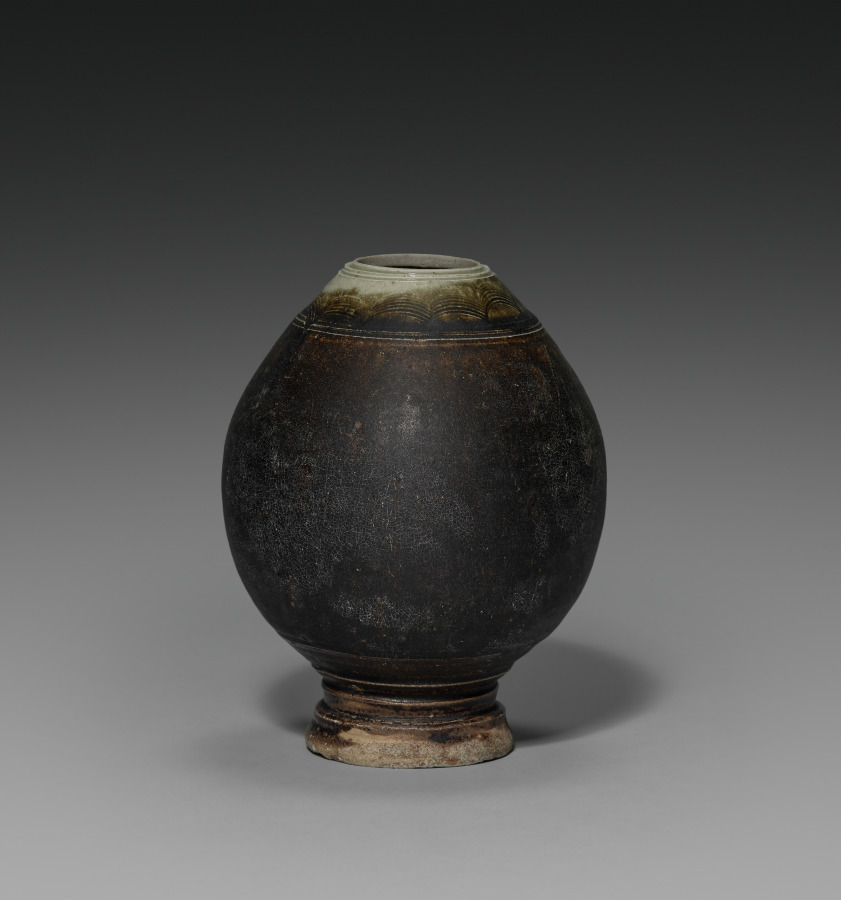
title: Jar in the Shape of a Fruit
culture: Cambodia, Northeast Thai kiln, Khmer Ware, Angkor Wat/Bayon period, 12th century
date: 1100s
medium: glazed pottery with brown slip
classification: Ceramic